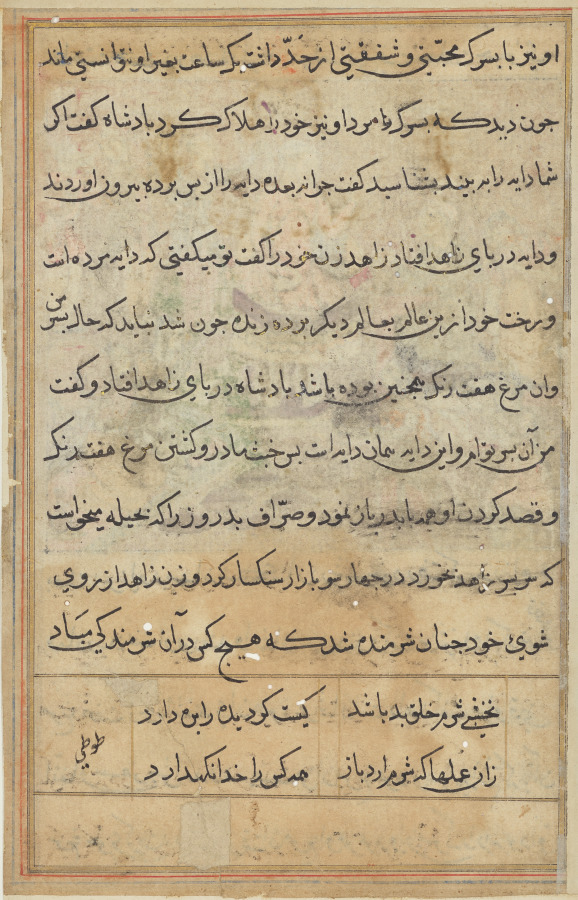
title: Page from Tales of a Parrot (Tuti-nama): text page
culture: Mughal India, court of Akbar (reigned 1556–1605)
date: c. 1560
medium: gum tempera, ink, and gold on paper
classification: Painting